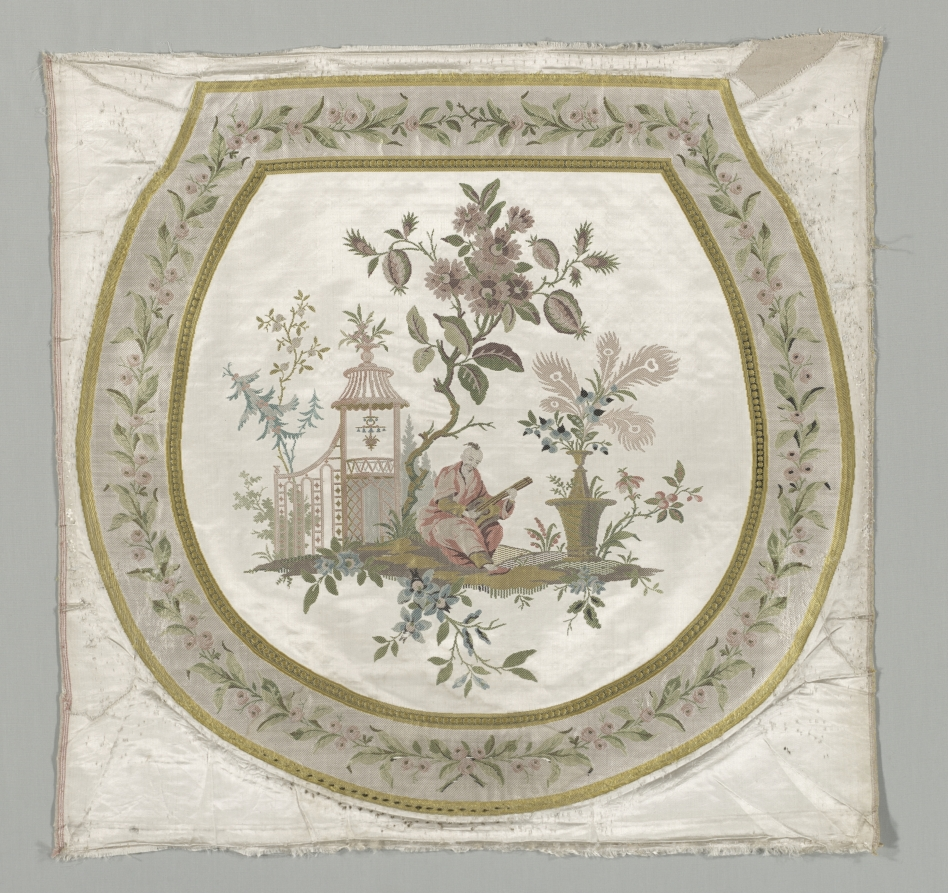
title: Upholstery for a Chair Seat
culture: France, 18th century, style of Louis XV (1723-1774)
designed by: Philippe de Lasalle (French, 1723–1805)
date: c. 1743–1774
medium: lampas weave, brocaded; silk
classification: Textile